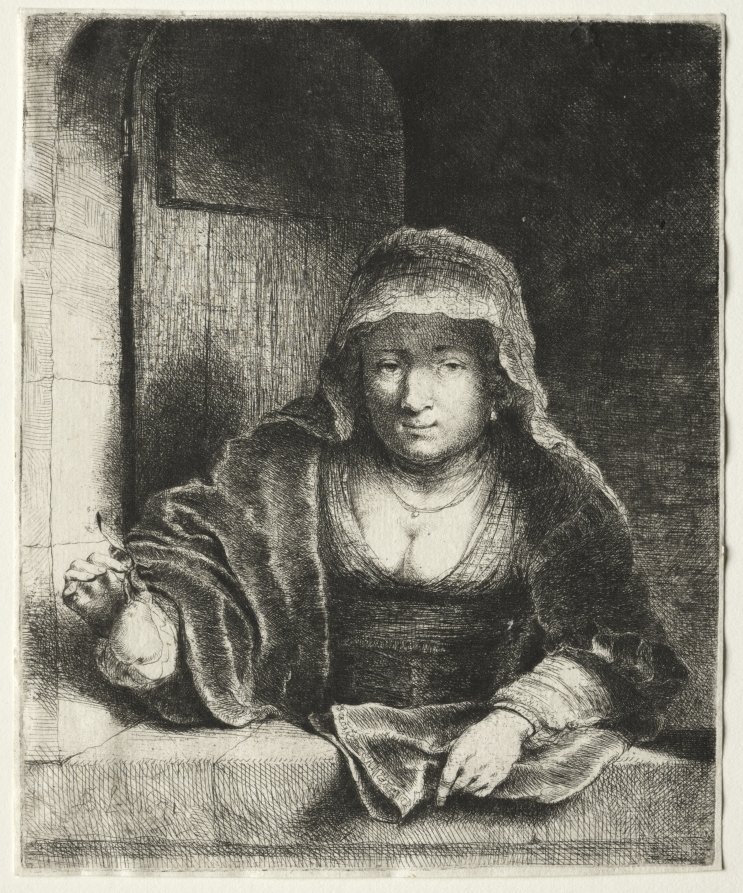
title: The Woman with the Pear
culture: Netherlands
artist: Ferdinand Bol (Dutch, 1616–1680)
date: 1651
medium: etching and drypoint with granular bitten tone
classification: Print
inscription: lower left, in plate: Bol 1651 ; upper center, in graphite: 13 ; lower center, in graphite: Holl III 1[8?]. [f?]. 12 [ii?] ; lower center, in graphite: D 281 ; lower center, in graphite: 16/3 ; lower left, in graphite: 106_/a ; lower left, in graphite: a667